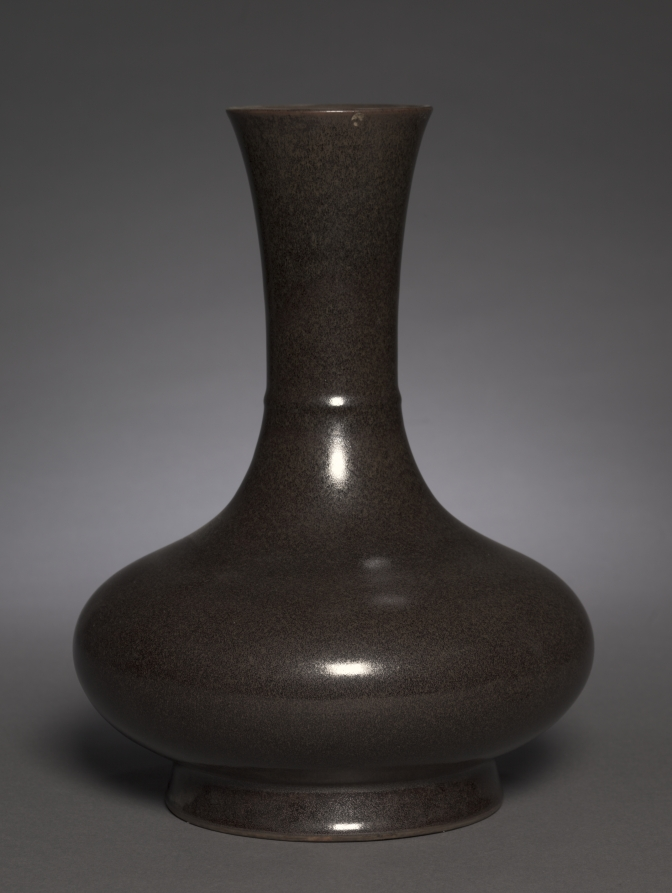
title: Vase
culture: China, Qing dynasty (1644–1911), Qianlong reign (1736–95)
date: 1736–95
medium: porcelain with dark brown glaze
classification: Ceramic